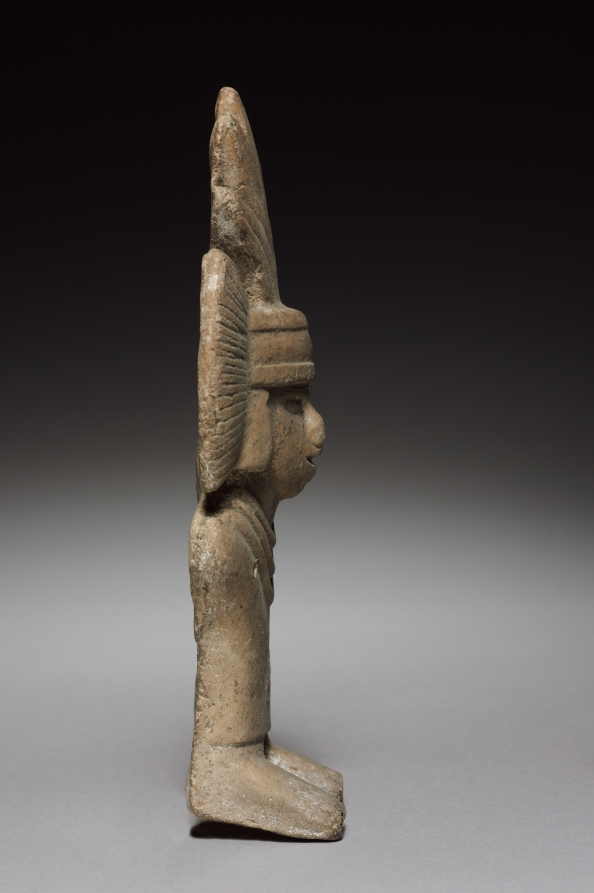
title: Figurine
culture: Mexico, Aztec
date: 1325–1521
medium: pottery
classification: Ceramic